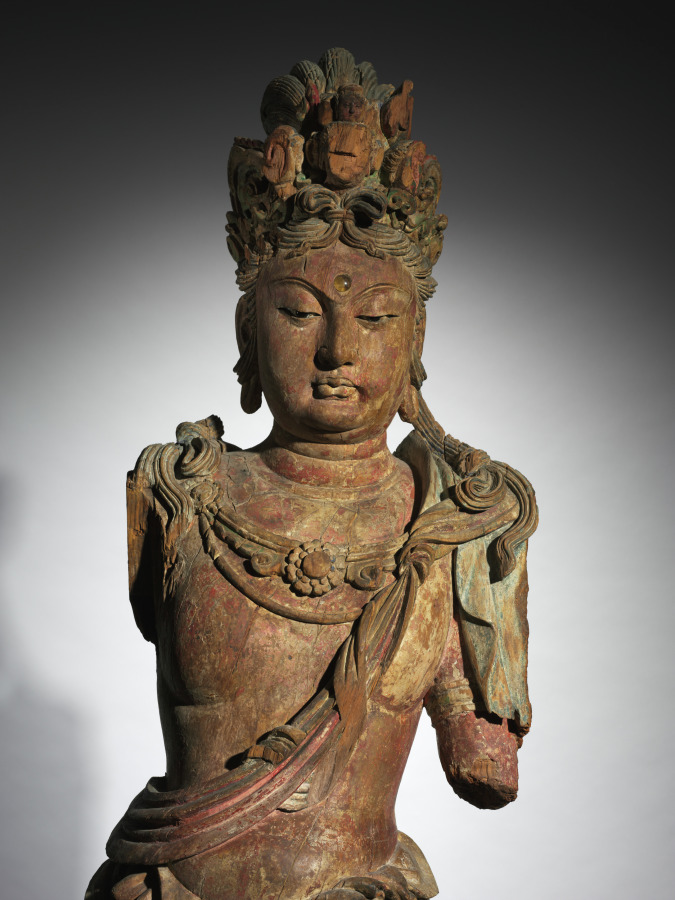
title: Eleven-Headed Guanyin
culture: China, late Northern Song dynasty (960-1127) - Jin dynasty (1115-1234)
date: 1100–1200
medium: wood with polychromy and cut gold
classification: Sculpture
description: The bodhisattva is an enlightened being dedicated to the spiritual awakening of all beings. The compassionate bodhisattva Guanyin, in a variety of manifestations, is probably the most popular deity of worship in Chinese Buddhism. In the Esoteric Buddhist form shown here, this standing Guanyin has a total of eleven heads, with smaller ones above the principal head. The uppermost head represents the Buddha Amitabha, to whom he is closely related. The eleven heads symbolize the Buddha’s steps on the path to enlightenment.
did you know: This Guanyin is carved from a single block of willow (genus Salix sp.).